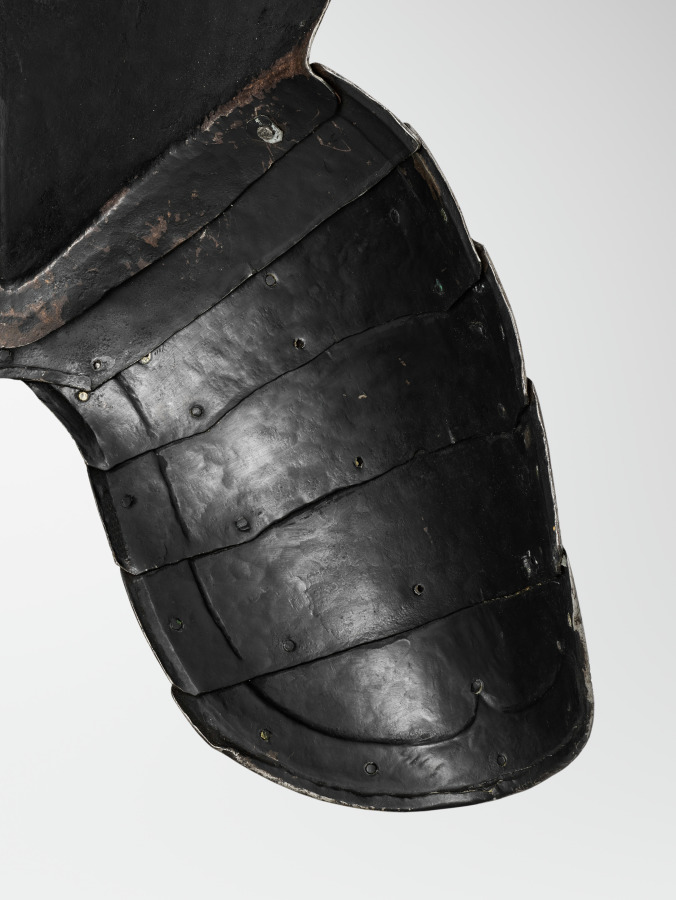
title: Tasset (proper right)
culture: South Germany, 16th century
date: c. 1560–1580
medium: steel, leather straps, brass rivets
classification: Arms and Armor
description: This armor was developed for the joust-a sporting combat between two mounted contestants. Although all of the elements of this armor date from the same period, they are not all from the same suit. This armor is thus called "composed." It also shows the asymmetry of jousting armor. The participants rode along a wall-like barrier known as a "tilt" with their left sides facing one another. Consequently, armor on that side of the body had to be thicker. Note the large plate (grandguard) over the left shoulder for extra protection. Also, the breathing holes in the helmet were placed on the right side (farthest from an opponent's lance) to avoid injuries from splinters. The bracket attached to the right breastplate is called the lance-rest, a shock-absorbing support designed to accommodate the lance when "couched" under the right armpit.